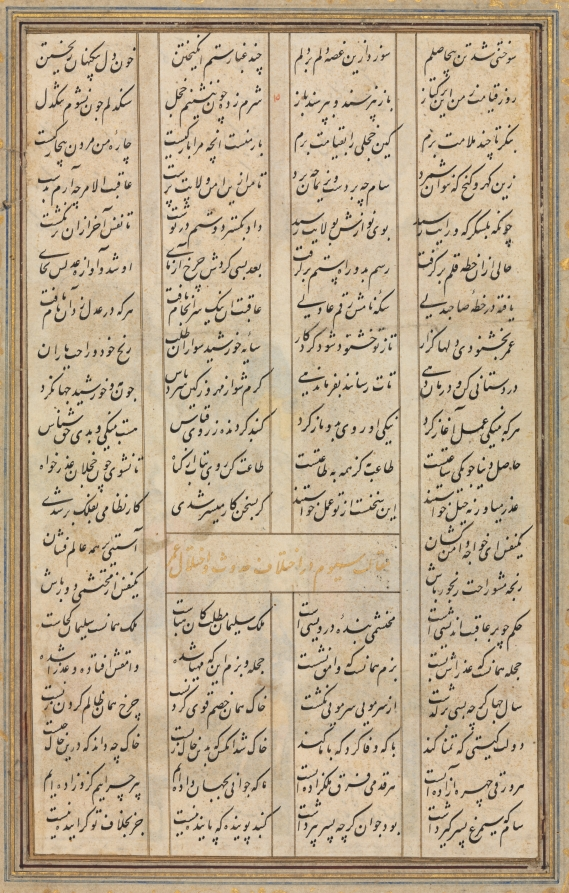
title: The Story of Nushirwan and his Minister, "The Third Discourse on Diverse Events and Disorder in Life" from a Khamsa (Quintet) of Nizami (1141–1209) (verso)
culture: Iran, Qazvin, Safavid period (1501-1722)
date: 1555–65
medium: ink and gold on paper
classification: Manuscript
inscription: script: Nasta'liq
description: This scene is from the Makhzan al-Ashrar, the first of the Quintet. Although more historically oriented than the following poems, it served more as a vehicle for moralizing tales than for historical events. In this scene Nushirwan asks the sage Buzurgmihr to explain what the owls perched on a ruined building are saying. He explains that one owl is offering the other as many ruined cities as he likes in exchange for his daughter's hand. He thus reproves Nushirwan for his love of conquest and war and the consequent destruction of many cities.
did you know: King Nushirwan is on a white horse, while his minister Buzurjmihr is riding a mule.